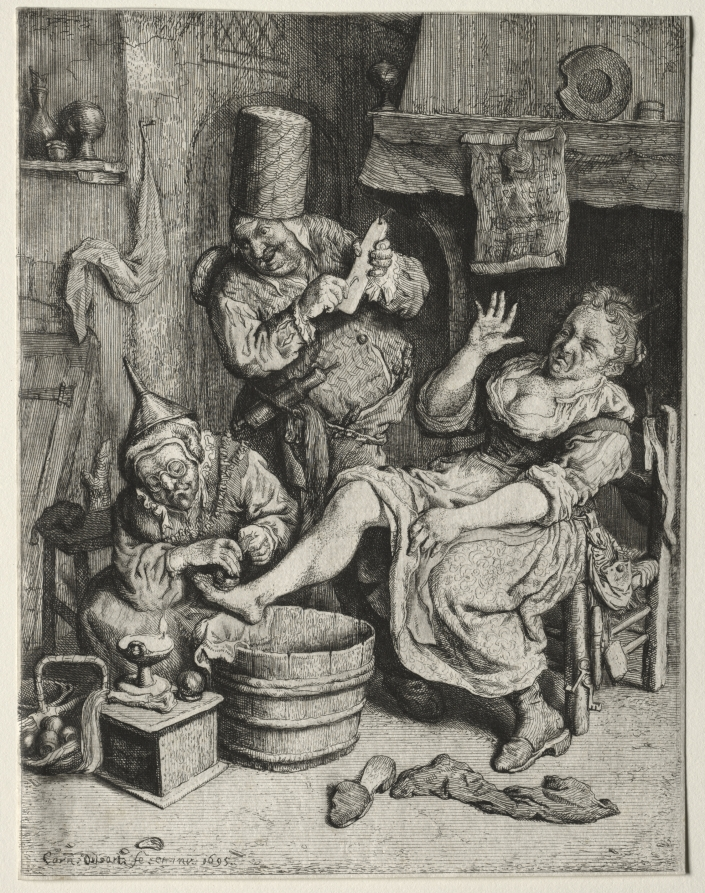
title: La Ventouse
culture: Netherlands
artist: Cornelis Dusart (Dutch, 1660–1704)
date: 1695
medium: engraving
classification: Print